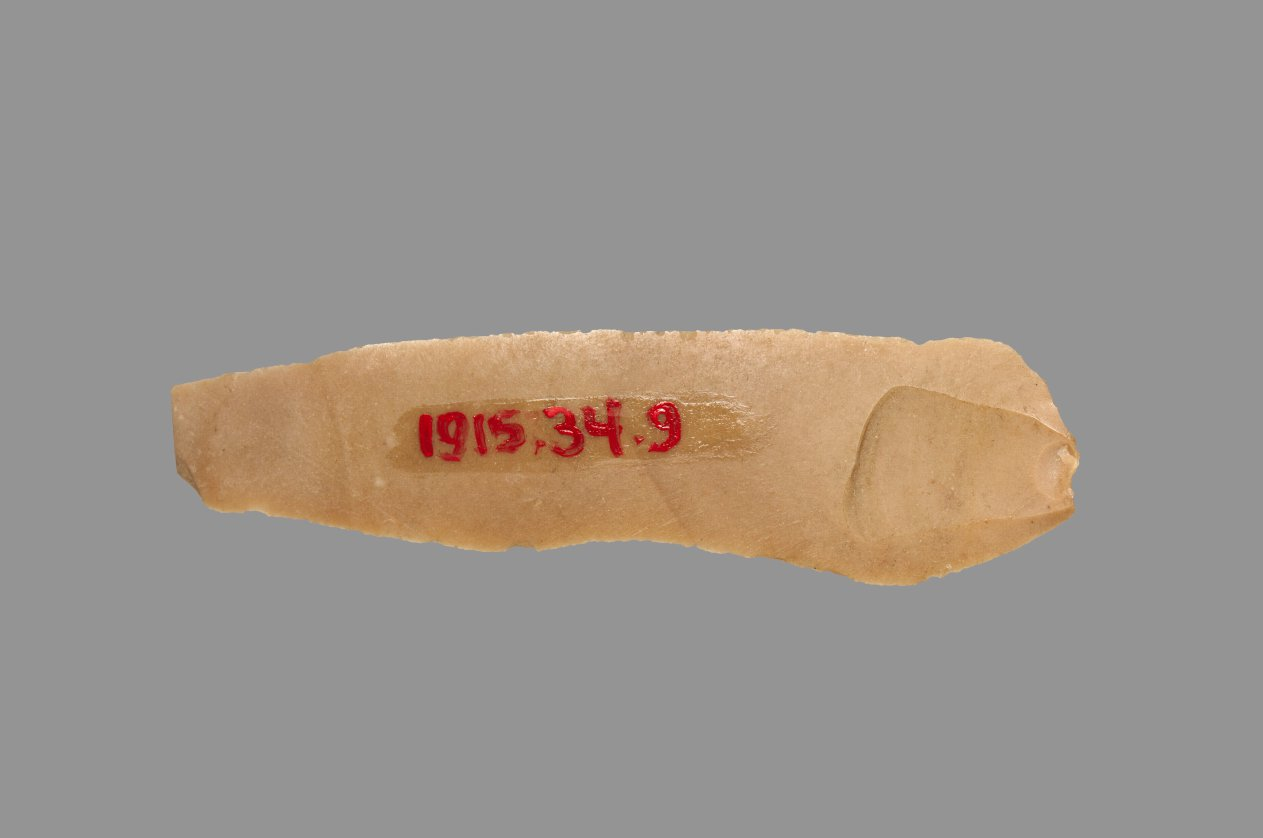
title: Sickle Blade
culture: Egypt, Middle Kingdom (2040–1648 BCE), Dynasty 12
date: 1980–1801 BCE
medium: flint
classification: Implements